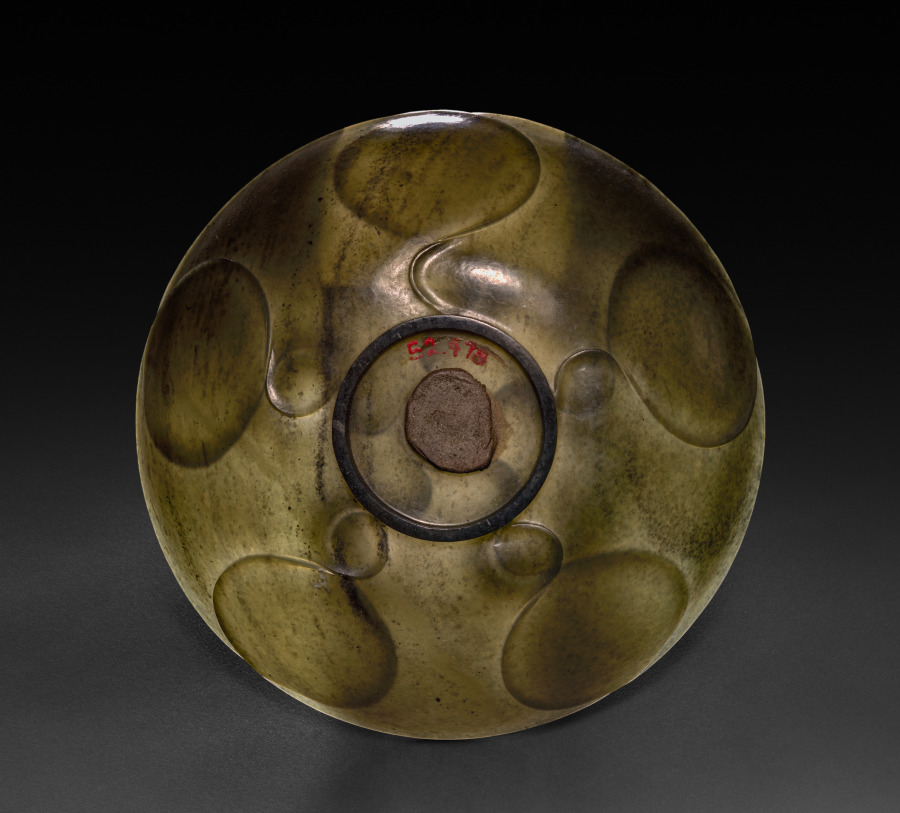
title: Lotus Bowl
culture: China, Qing dynasty (1644-1911)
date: 1700s or later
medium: jade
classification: Jade